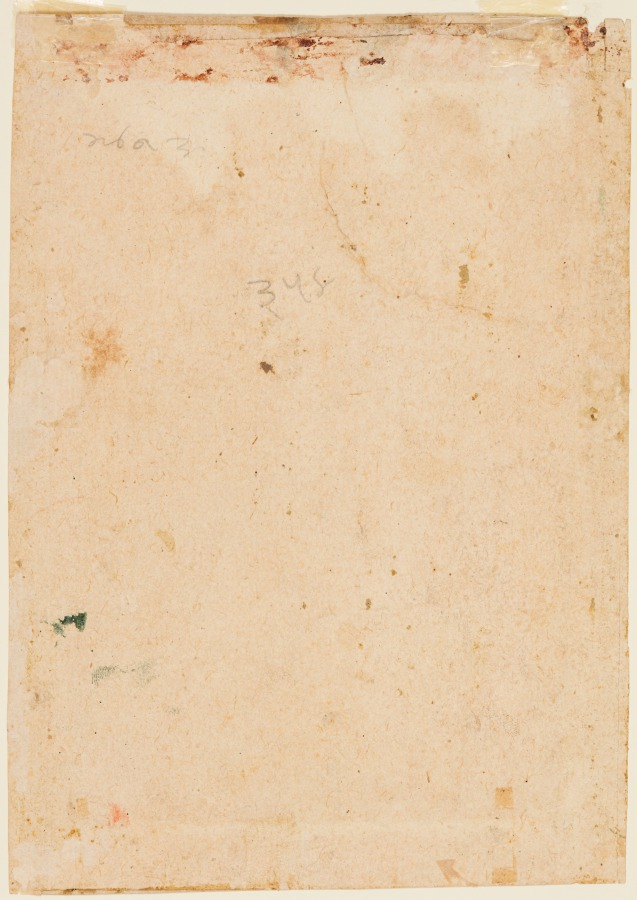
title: A girl worshipping the rising sun (Surya puja)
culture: Northwestern India, Rajasthan, Rajput Kingdom of Devgarh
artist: attributed to Chokha (Indian, active c. 1799–1824)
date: c. 1810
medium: gum tempera and gold on paper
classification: Painting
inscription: [[verso]] 659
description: Clad in only her undergarment, an adolescent girl performs a ritual of morning prayer. She pours a stream of water that splashes down the steps of the platform on which she stands, her garland and orange sari on the ground behind her. Devotional practice in India can occur in nature, in the open air, without the presence of a temple, icon, or a priest. Animals stir in the hills, and a goose has caught a fish. The artist appears to have connected the peace and bounty of the land with the pious act of honoring the sun with water.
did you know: One of the two ducks in the lotus pond has a fish in its bill.